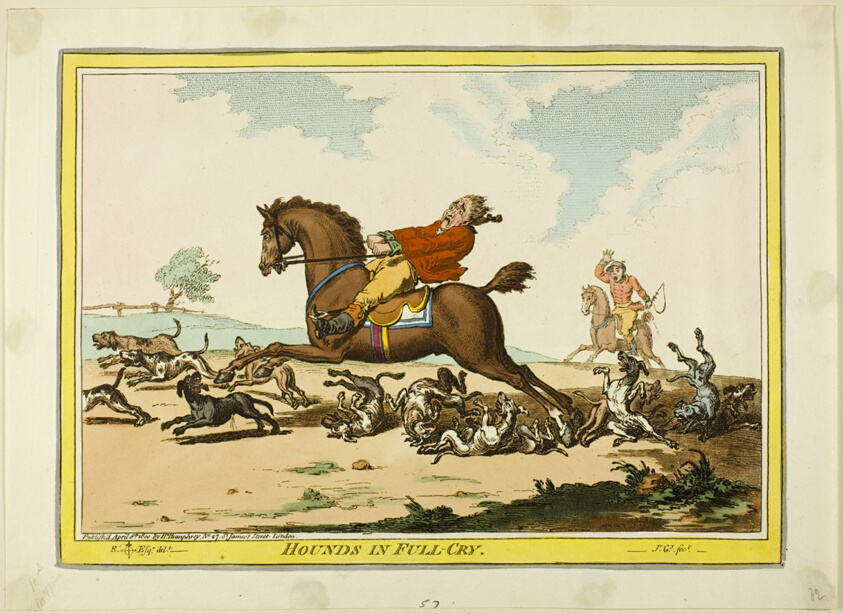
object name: Print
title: Hounds in Full Cry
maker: James Gillray (English, 1756-1815); after Brownlow North (English, 1778-1829)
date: published April 8, 1800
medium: Hand-colored etching on paper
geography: England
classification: etching; print; prints and drawing